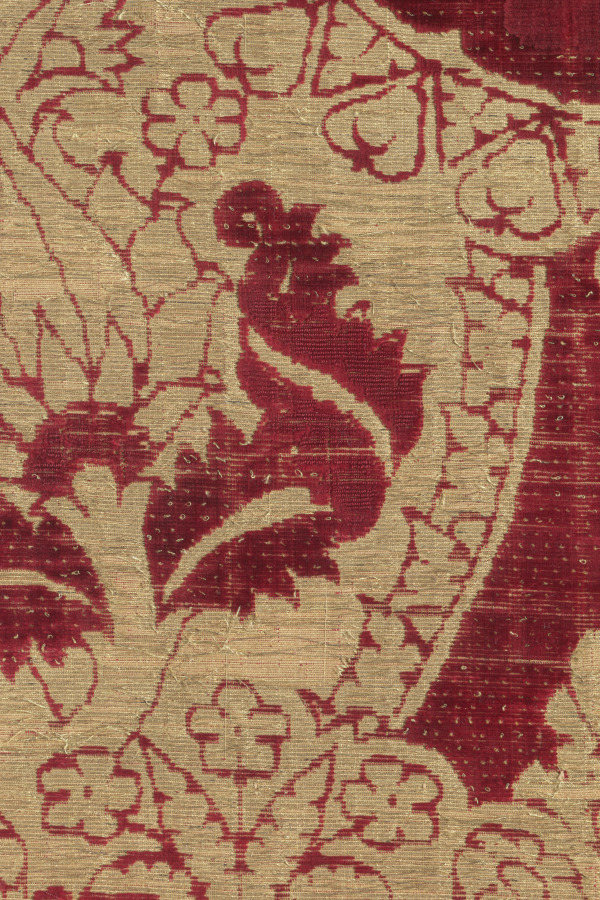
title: Silk Velvet with Gold in Pomegranate Pattern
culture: Italy, possibly Florence, 15th century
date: 1450–1500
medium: silk, gold thread; velvet: cut pile in two heights, uncut pile loops, gold-thread loops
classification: Velvet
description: Luxurious silk velvets with expensive gold thread were symbols of wealth and power. The finest velvets during the 1400s have two, or even three, heights of lush projecting pile. This fashionably large pomegranate pattern features exorbitant gold-thread loops enriching the lower level and a plain higher level. The curved upper and lower contours suggest this was the back of a sleeveless ecclesiastical vestment known as a chasuble. The striped green and ivory selvage was the equivalent of a label, required by law. It identified the fiber content, its quality, and quantity, which determined the price. Selling prices reflected the costs of the raw materials—gold thread, silk, and dyestuffs. Compensation for artisans was generally minimal.